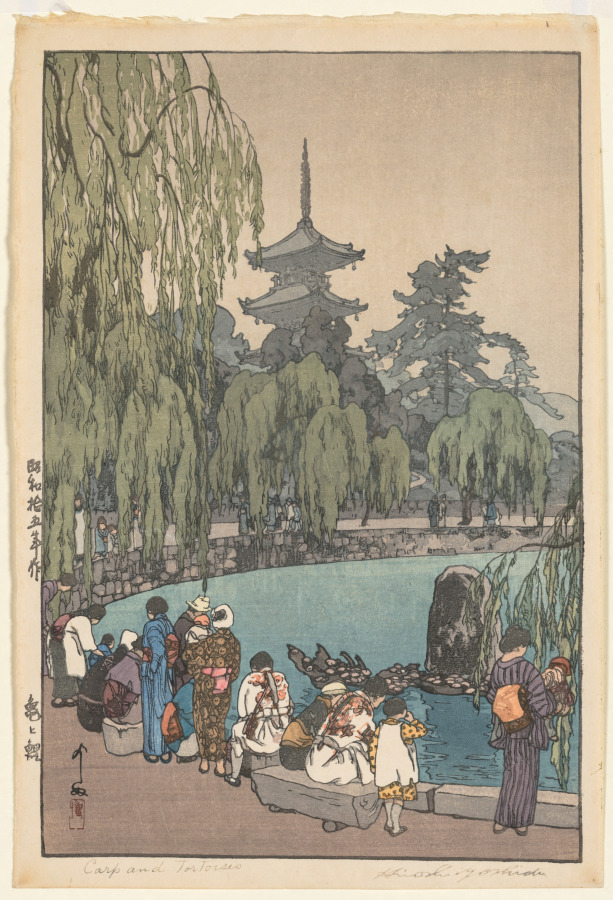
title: Carp and Tortoises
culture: Japan, Shōwa period (1926–89)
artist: Yoshida Hiroshi (Japanese, 1876–1950)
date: after 1940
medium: Woodblock print; ink and color on paper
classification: Print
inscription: Lower margin in graphite: Carp and Tortoises Hiroshi Yoshida